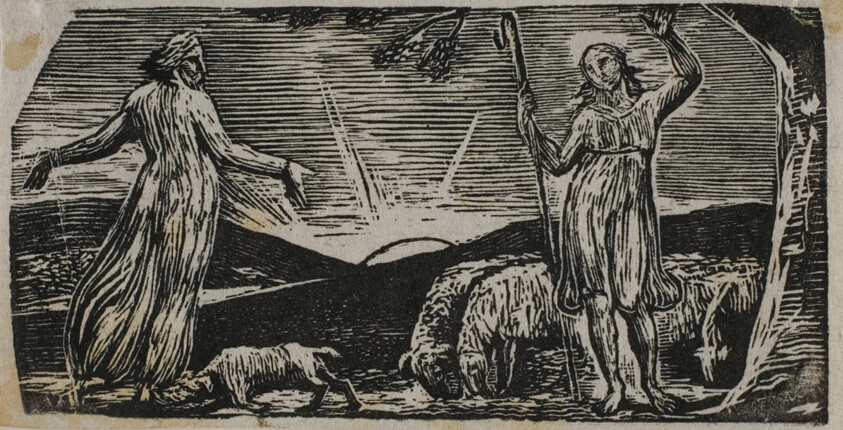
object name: Print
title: Thenot Remonstrates with Colinet, from The Pastorals of Virgil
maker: William Blake (English, 1757-1827)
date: 1821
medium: Wood engraving on off-white wove paper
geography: England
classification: wood engraving; print; prints and drawing; paper